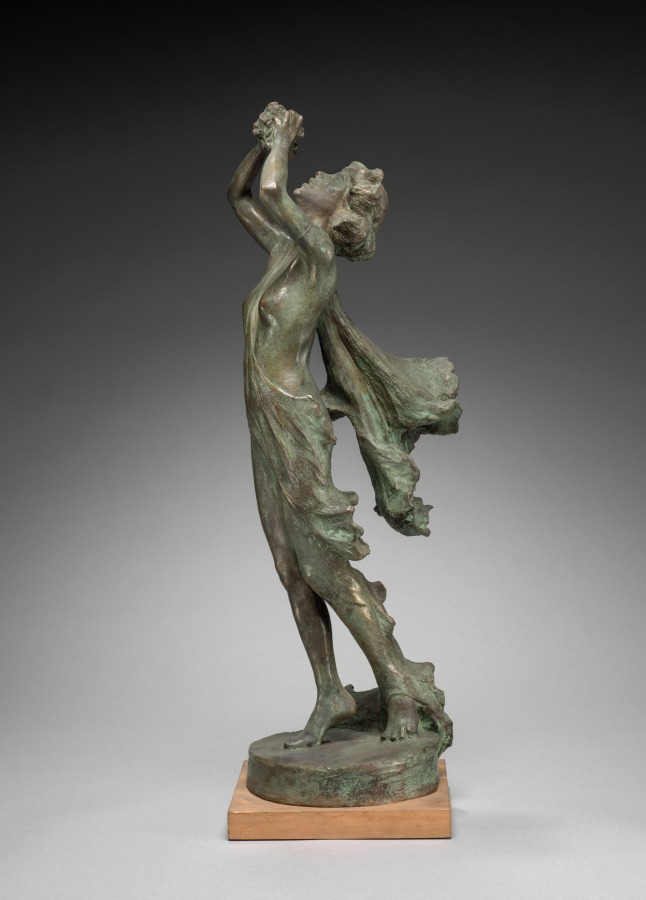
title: Fountain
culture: America, Ohio, Cleveland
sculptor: Jessica Wakem McMurray (American, born England, 1874–1950)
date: 1920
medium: bronze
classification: Sculpture